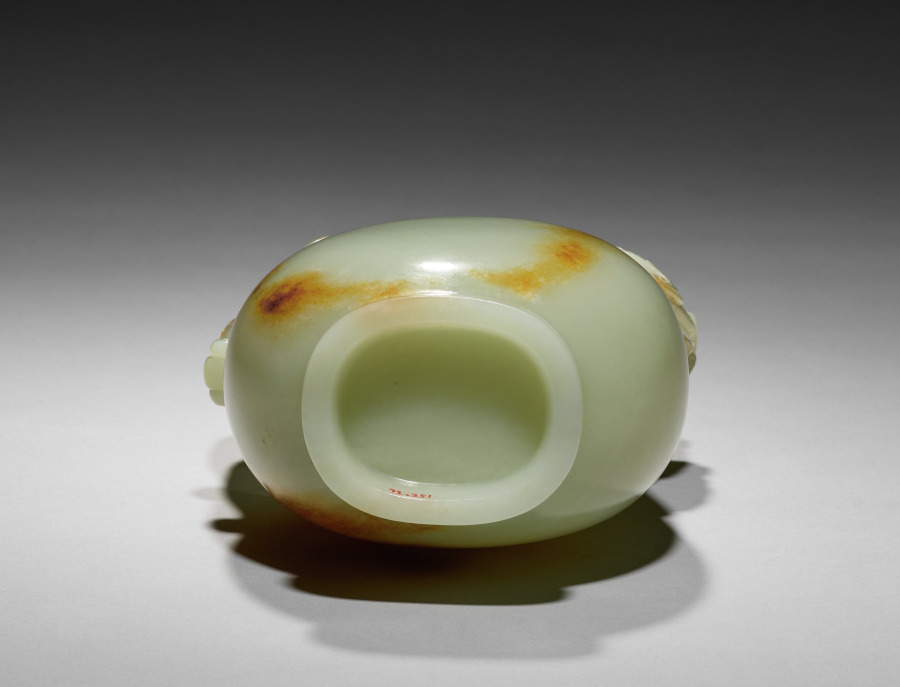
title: Pitcher (Gong) with Dragon and Bird-Headed Handle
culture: China, Qing dynasty (1644–1911)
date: 1700s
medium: pale greenish-white jade with brown markings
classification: Jade